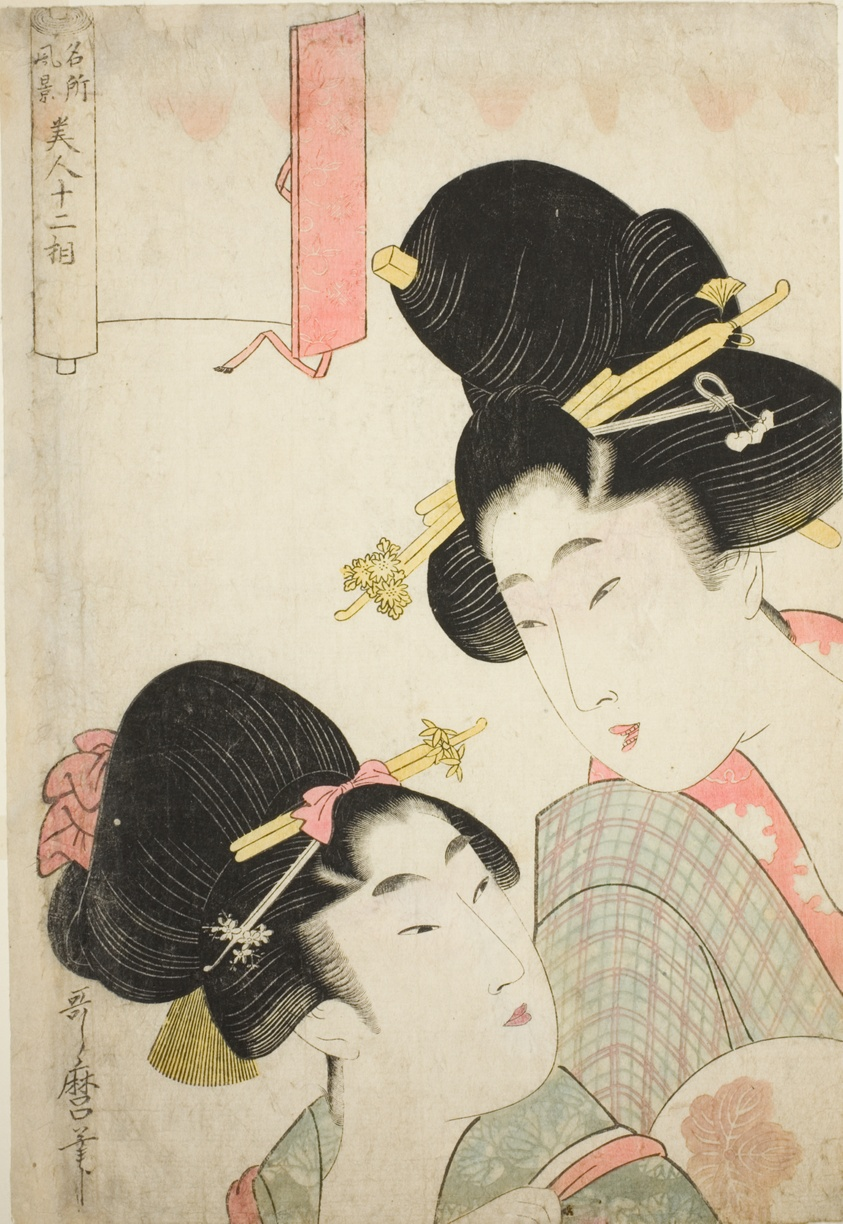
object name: Print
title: Two Girls, from the series "Twelve Physiognomies of Beautiful Women Representing Views of Famous Places (Meisho fukei bijin juni so)"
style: Japanese (culture or style)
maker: Kitagawa Utamaro 喜多川 歌麿; Japanese, 1753 (?)-1806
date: c. 1803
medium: Color woodblock print; oban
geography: Japan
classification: woodblock print; print; asian art